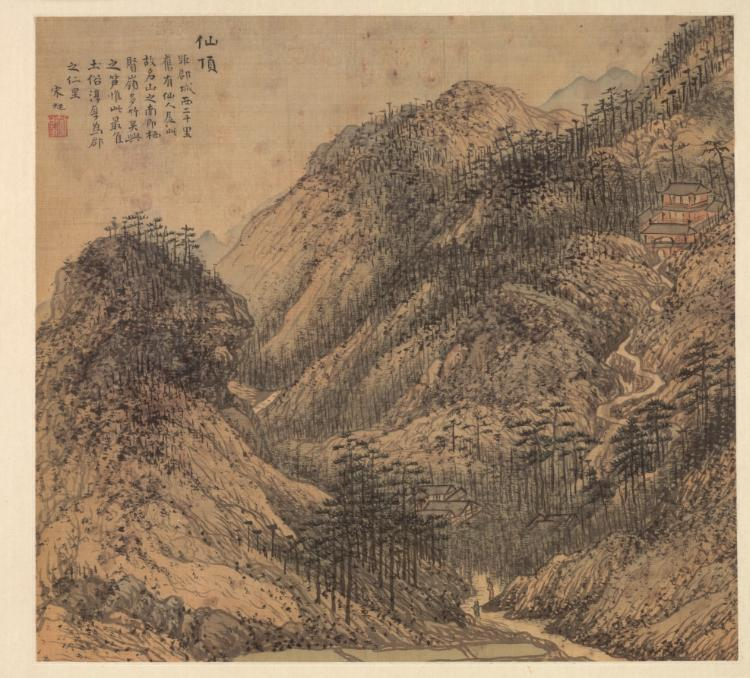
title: Xianding (Immortal's Peak)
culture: China, Jiaxing, Ming dynasty (1368–1644)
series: Eighteen Views of Huzhou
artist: Song Xu (Chinese, 1525-c. 1606)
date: c. 1588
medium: Album leaf; ink and color on silk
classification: Painting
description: By the 1500s, visits to historic and scenic sites in the lower Yangzi delta stimulated an increase of printed illustrated travel books. Topographical depictions of local scenery flourished. Leaves from this album illustrates sites around Lake Tai of the two adjacent counties Changxing and Wuxing (modern Huzhou). Song Xu, who lived intermittently in Jiaxing and Songjiang, must have passed through Wuxing by boat and thus knew the region. The paintings are inscribed with gazetteerlike notations, suggesting that the album was produced for clients as commemorative works, a travel guide, or for “armchair travel” (woyou) in one’s mind.